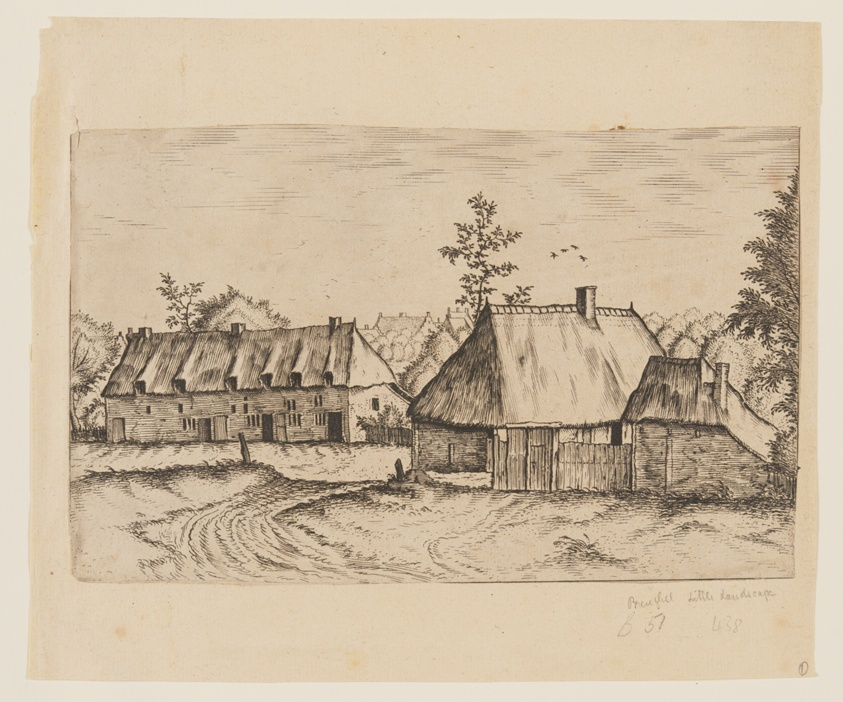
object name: Print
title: Road Leading to a Stable and a Barn, from Master of the Small Landscape Series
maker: Johannes van Doetecum (Netherlandish, 1528/32–1605) and Lucas Doetecum (Dutch, died before 1584); after the Master of the Small Landscapes (Flemish, active 1555-1600)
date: c. 1560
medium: Engraving on ivory laid paper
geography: Netherlands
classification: engraving; paper; print; prints and drawing